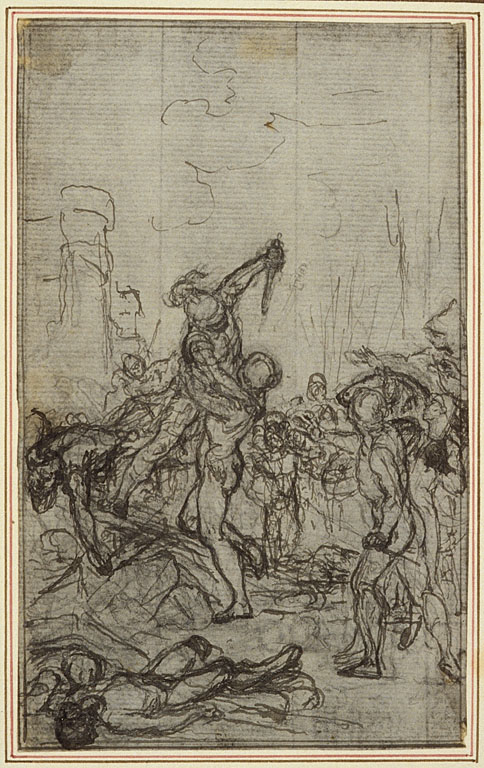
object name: Drawing and Watercolor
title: Study for Lucain's "La Pharsale", Canto IV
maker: Hubert François Gravelot (French, 1699-1773)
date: c. 1766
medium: Pen and black ink, with graphite, on gray laid paper, incised for transfer, and perimeter mounted on ivory laid paper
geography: France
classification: pen and ink drawings; drawings (visual works); prints and drawing